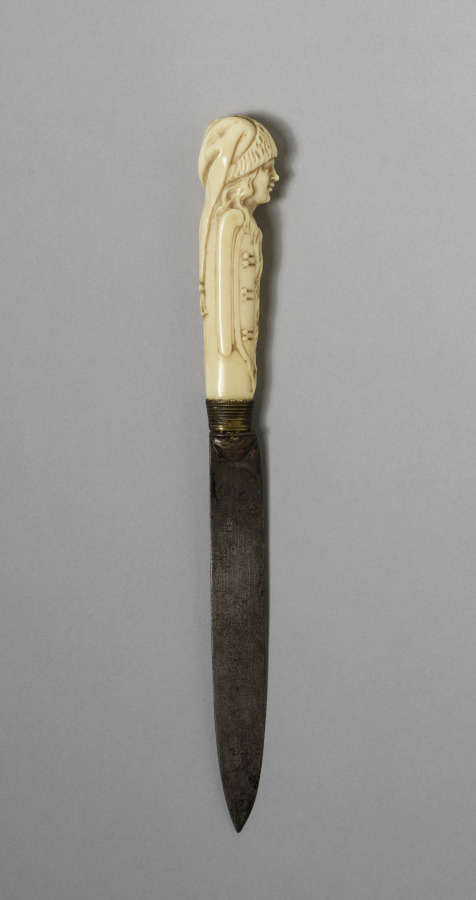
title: Knife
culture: Italy, 18th century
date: 1700s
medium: metal blade, ivory handle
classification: Ivory